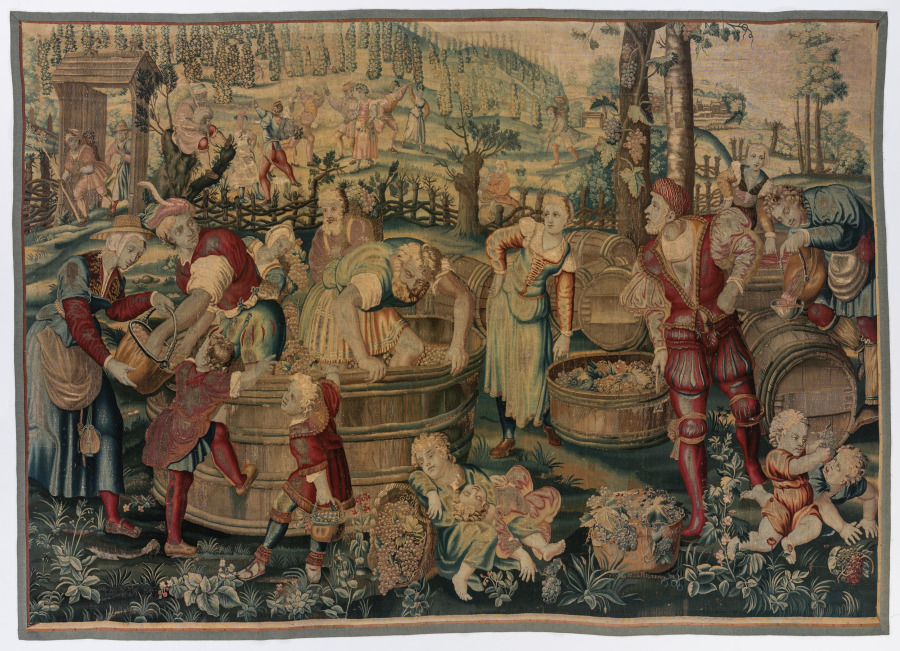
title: Autumn: Vintage Scene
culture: France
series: Four Seasons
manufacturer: possibly by Gobelins Manufactory (France, Paris, est. 1662)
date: designed c. 1535, woven mid- to late 1600s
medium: Wool, silk, and gold filé: tapestry weave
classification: Tapestry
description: In 16th-century Europe, the grape harvest took place in autumn, a tradition that persists among vintners to this day. Here, men and women gather grapes in buckets and drop them into an enormous wood vat. Two men stomp on the ripe grapes, squeezing out the juice. A man on the far right pours the juice into barrels, where it will ferment into wine. Children sleep or play in the foreground; one mischievous toddler presses grape juice into the mouth of another small child. In the distance four couples dance to music provided by a bagpiper, who is perched in a tree.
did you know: Originally green, the plants were woven using yarn first dyed blue and then dyed yellow; over time the yellow dye has faded so that today the plants appear blue.